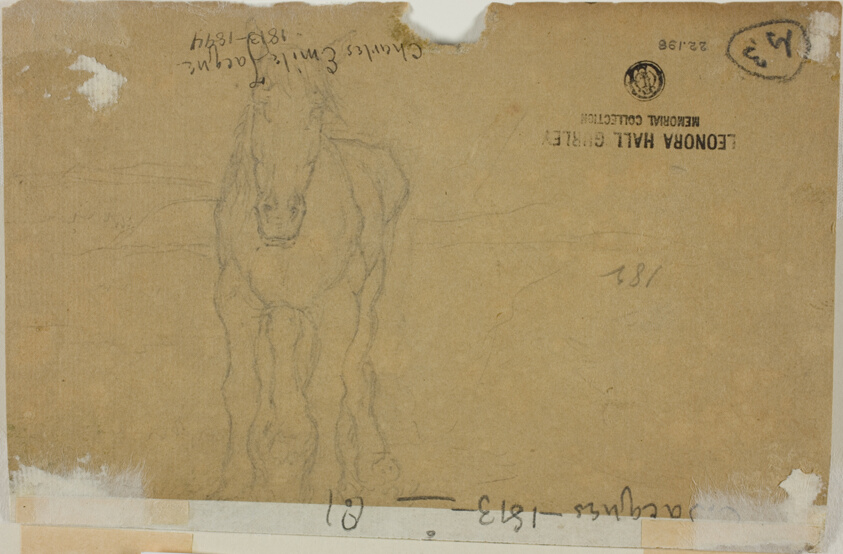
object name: Drawing and Watercolor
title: Emaciated Horse (recto); Frontal View of a Horse (verso)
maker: Charles Émile Jacque (French, 1813-1894)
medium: Black chalk, with charcoal, heightened with touches of white chalk, over graphite, selectively varnished with gum arabic (recto) and graphite (verso) on brown laid paper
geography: France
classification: chalk; drawings (visual works); prints and drawing